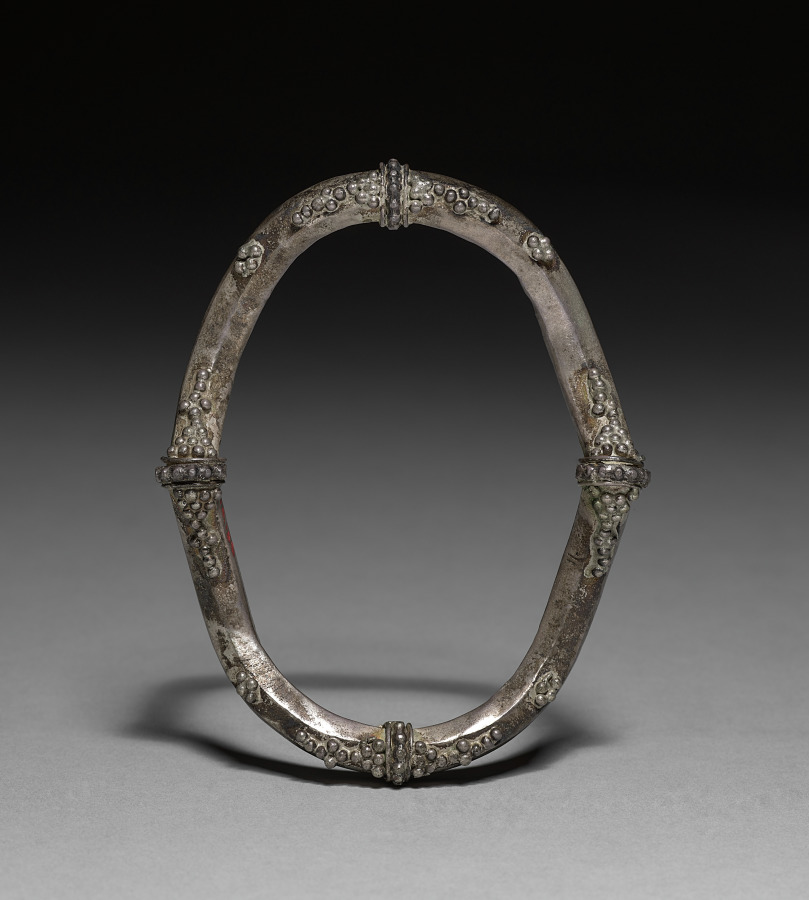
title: Foot Ornament (padasara)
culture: South India, Mysore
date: 1800s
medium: silver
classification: Jewelry